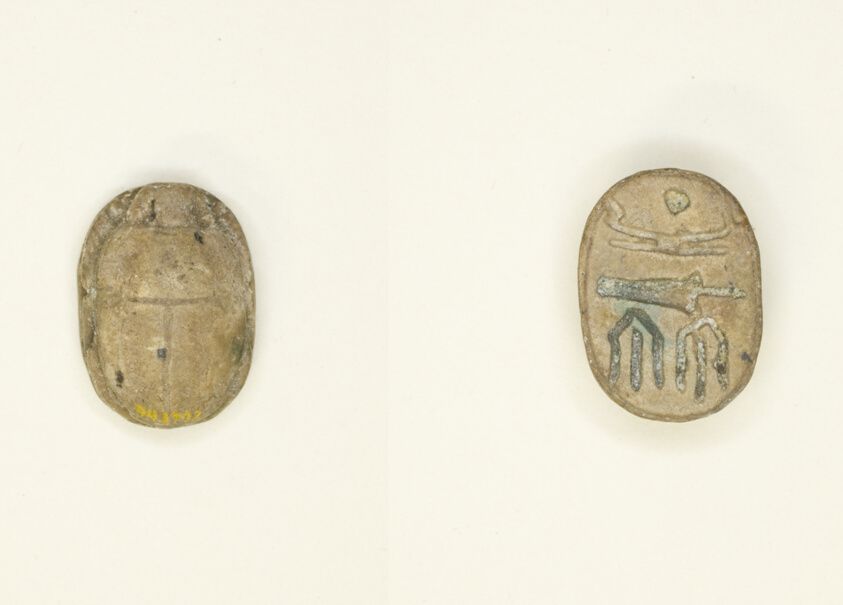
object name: Costume and Accessories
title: Scarab: Wish Formula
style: third intermediate period, ancient, egyptian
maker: Egyptian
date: Third Intermediate Period, Dynasties 21-25 (about 1069-664 BCE)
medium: Steatite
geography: Egypt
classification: scarab; ancient art; costume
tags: Hieroglyphs, boats, gods (deities), insects, sun, suns